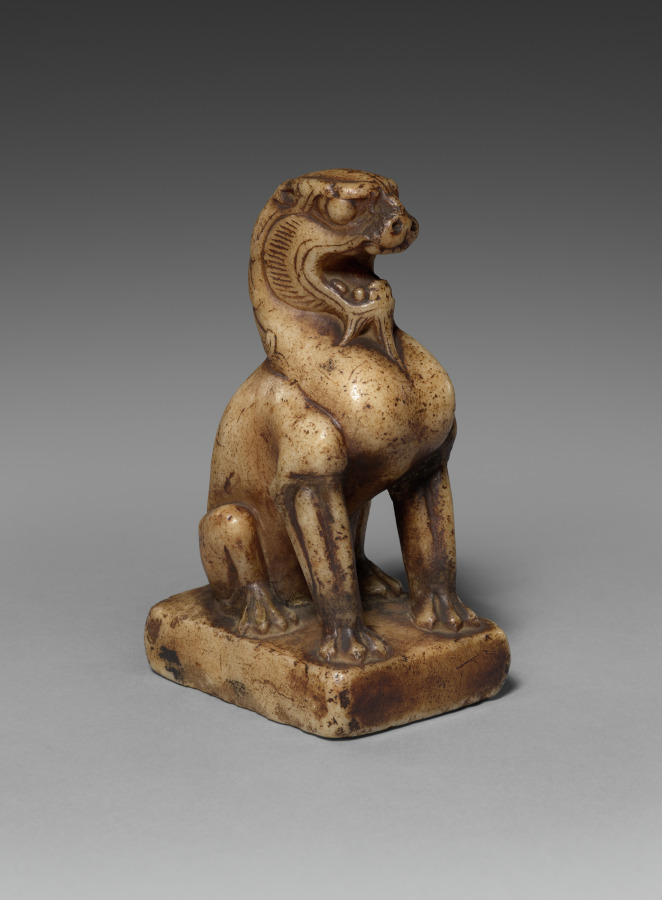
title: Lion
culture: China, Tang dynasty (618-907)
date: 618–907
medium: marble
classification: Sculpture